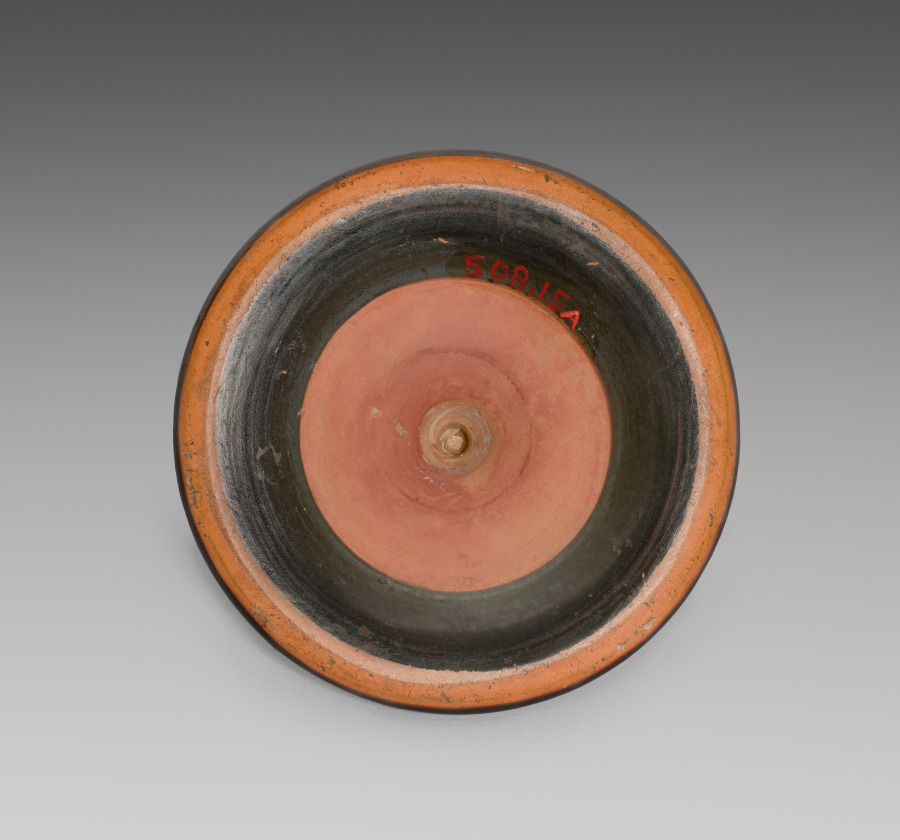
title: Foot from Red-Figure Kylix (Drinking Cup)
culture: Greece, Athens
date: c. 480 BCE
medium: ceramic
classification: Ceramic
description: Removed during an extensive conservation treatment in 1990, this foot was broken from a different kylix and used in an ancient repair. It likely once belonged to a differently proportioned cup than the one to which it was long attached, as seen by its thicker stem and smaller foot diameter.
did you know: Originally from a different kylix, this foot was used in an ancient repair.